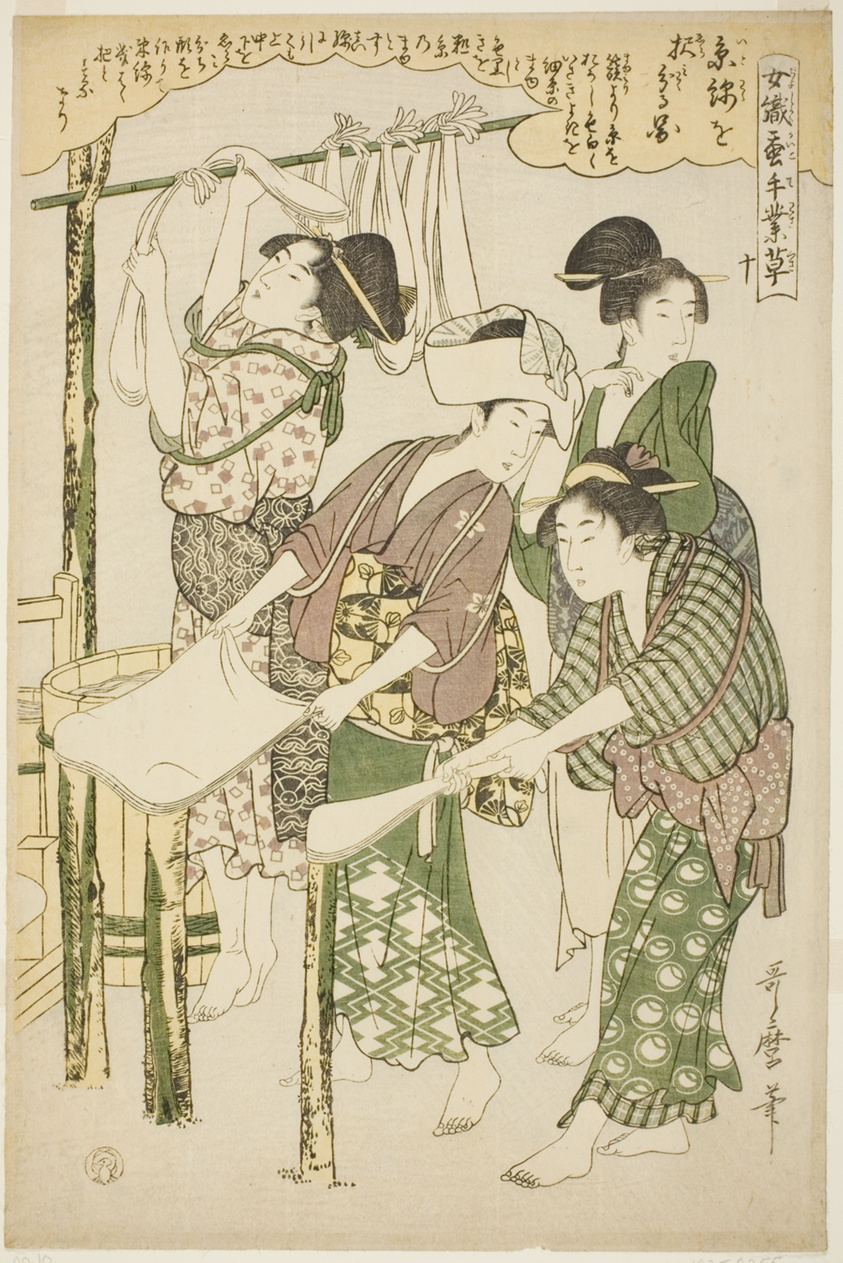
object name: Print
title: No. 10 (ju), from the series "Women Engaged in the Sericulture Industry (Joshoku kaiko tewaza-gusa)"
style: Japanese (culture or style)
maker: Kitagawa Utamaro 喜多川 歌麿; Japanese, 1753 (?)-1806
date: c. 1798/1800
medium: Color woodblock print; oban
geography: Japan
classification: woodblock print; print; asian art